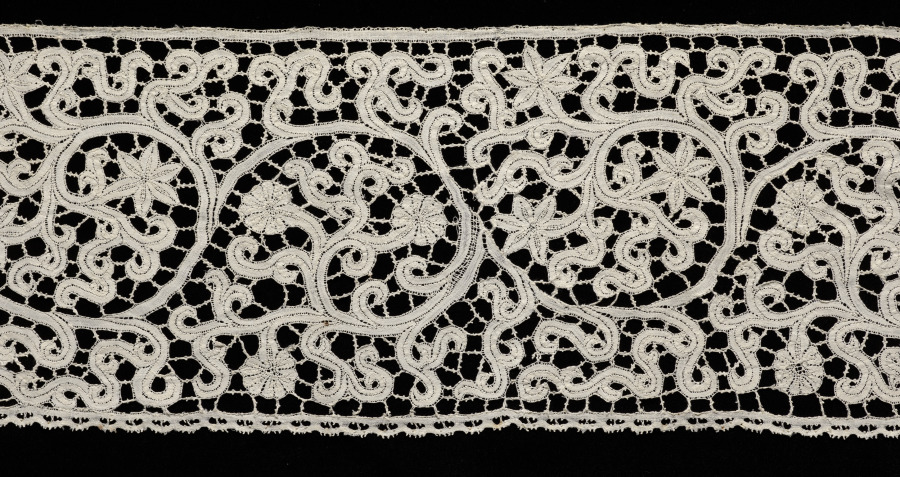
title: Lace Flounce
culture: Italy, Milan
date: 1600s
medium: Bobbin lace (Punto di Milano)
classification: Lace